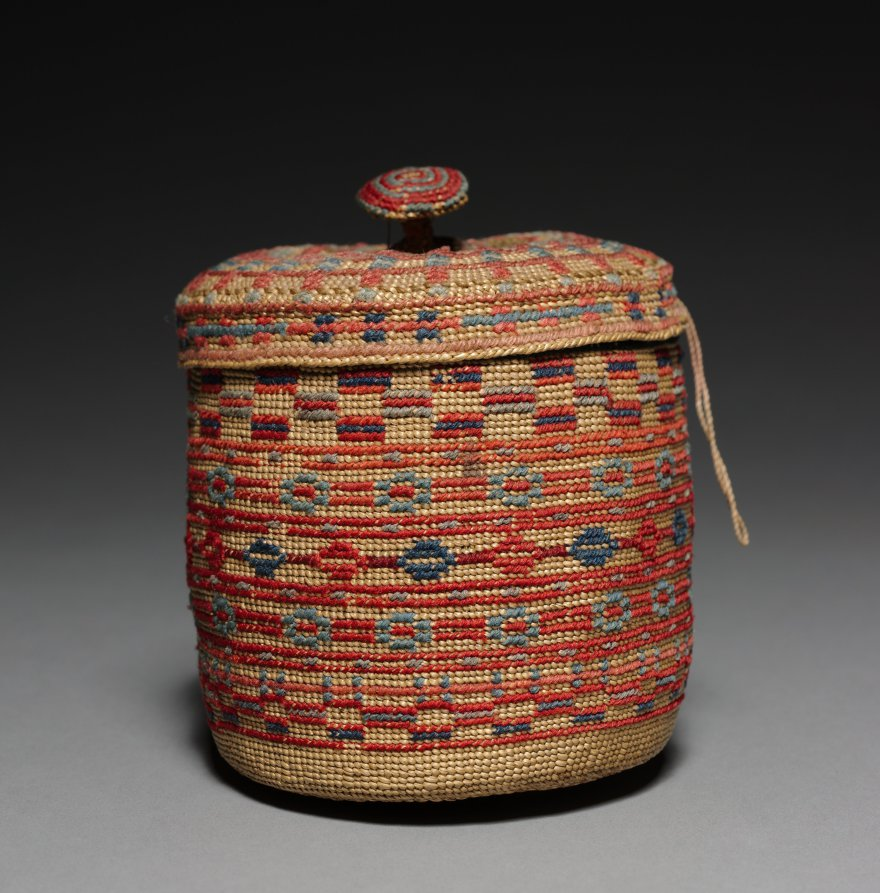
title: Covered Basket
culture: Arctic, Aleut, late 19th-early 20th century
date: late 1800s–early 1900s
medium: wool embroidery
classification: Basketry